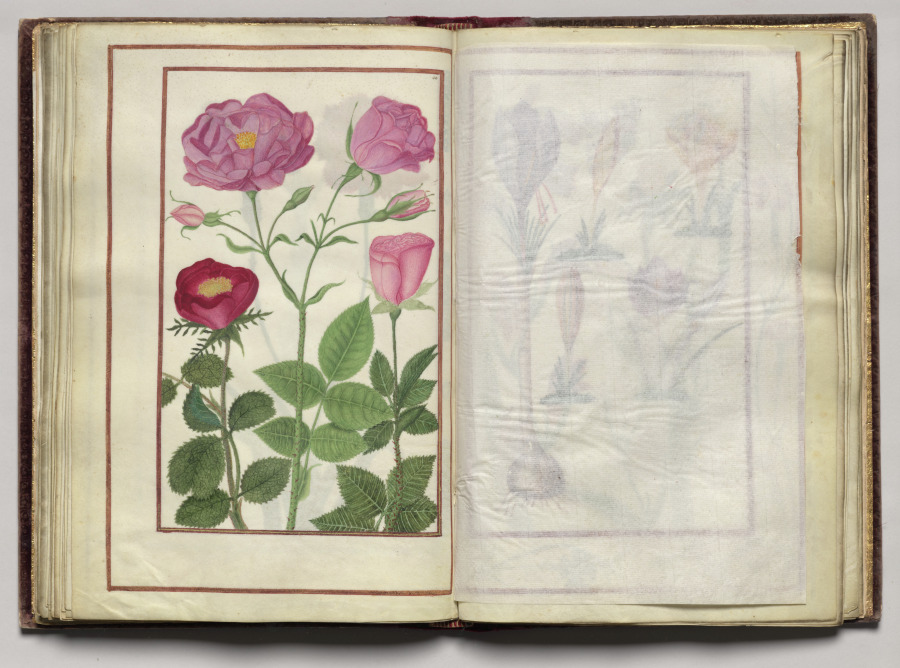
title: Roses, folio 33 (verso), from Florilegium (A Book of Flower Studies)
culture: France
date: 1608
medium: watercolor, ink, silver, and gold over occasional traces of pencil, on vellum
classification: Bound Volume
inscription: Dated: Poitiers 1608 (on frontispiece) Signed: On frontispiece in black ink, lower right: Van Kuyk Notation on drawing: Frontispiece: in pencil, lower margin: * élève de Van Kessel, peintre flammand (* in pencil also appears in front of Van Kuyk's name).